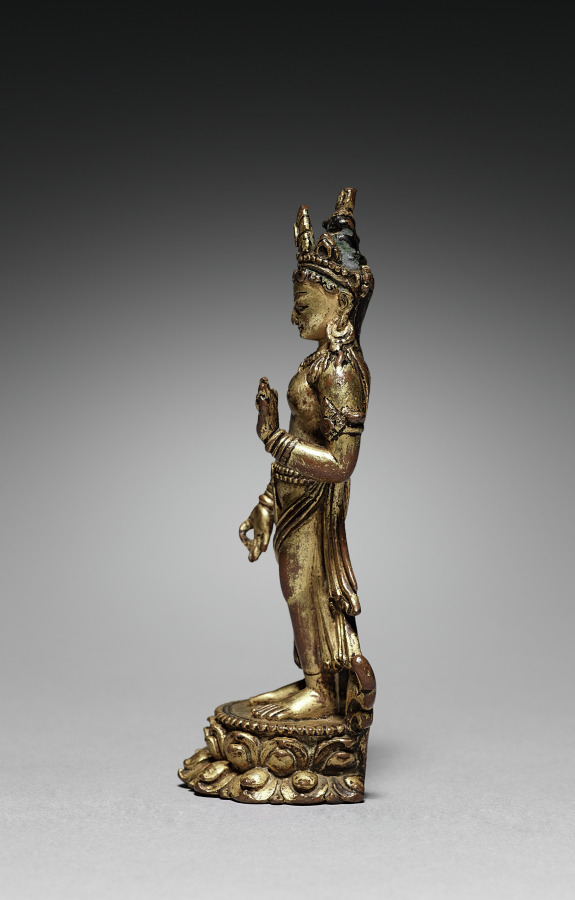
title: Standing Tara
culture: Nepal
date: 1300s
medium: bronze, gilded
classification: Sculpture